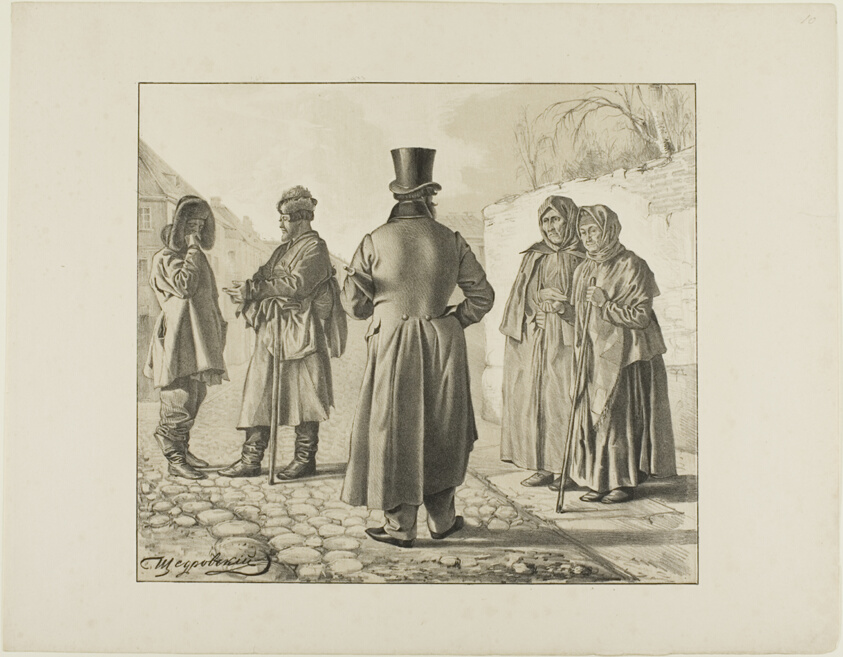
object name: Print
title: Scenes from Russian Folk Life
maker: Ignatii Stepanovich Shchedrovskii (Russian, 1815-1870)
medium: Color lithograph on paper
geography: Russia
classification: lithograph; print; prints and drawing